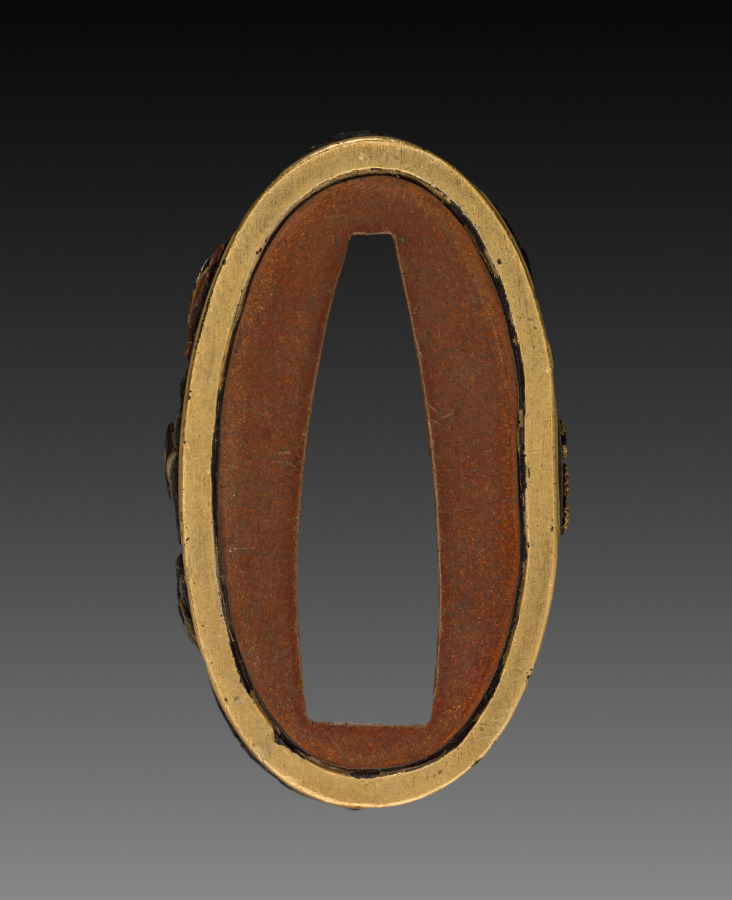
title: Sword-Hilt Collar (Fuchi)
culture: Japan, Edo period (1615–1868)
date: 1700–1850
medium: shakudo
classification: Arms and Armor